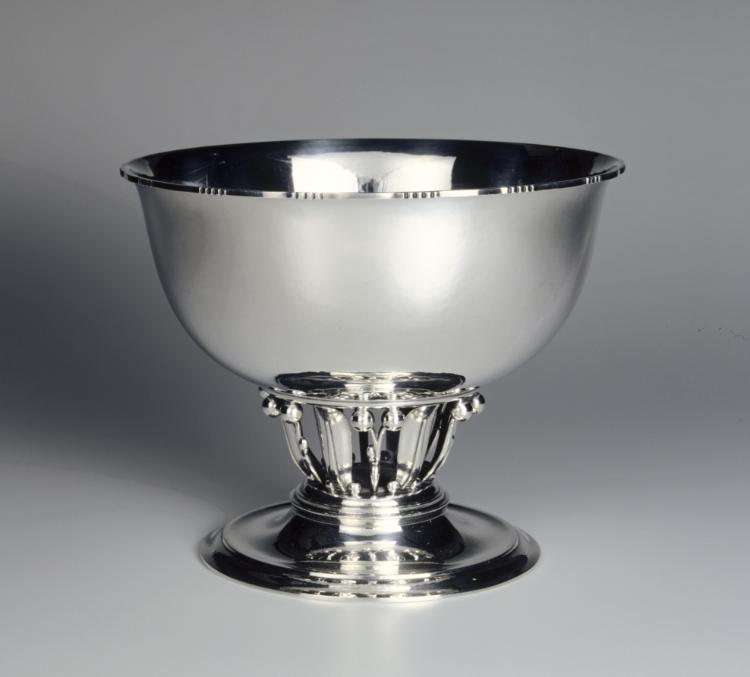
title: Bowl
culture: Denmark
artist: firm of Georg Jensen (Danish, 1866–1935)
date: 1955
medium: silver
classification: Silver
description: The Danish silversmiths at the firm of Georg Jensen have produced some of the most distinguished silver pieces of the 20th century, combining a conservative modern style with traditional techniques of crafts-manship. The bowl bears the following inscription: "Walter and Esther Doxsey, from the members of the American Steel Warehouse Association, with esteem and affection, May 24, 1955."